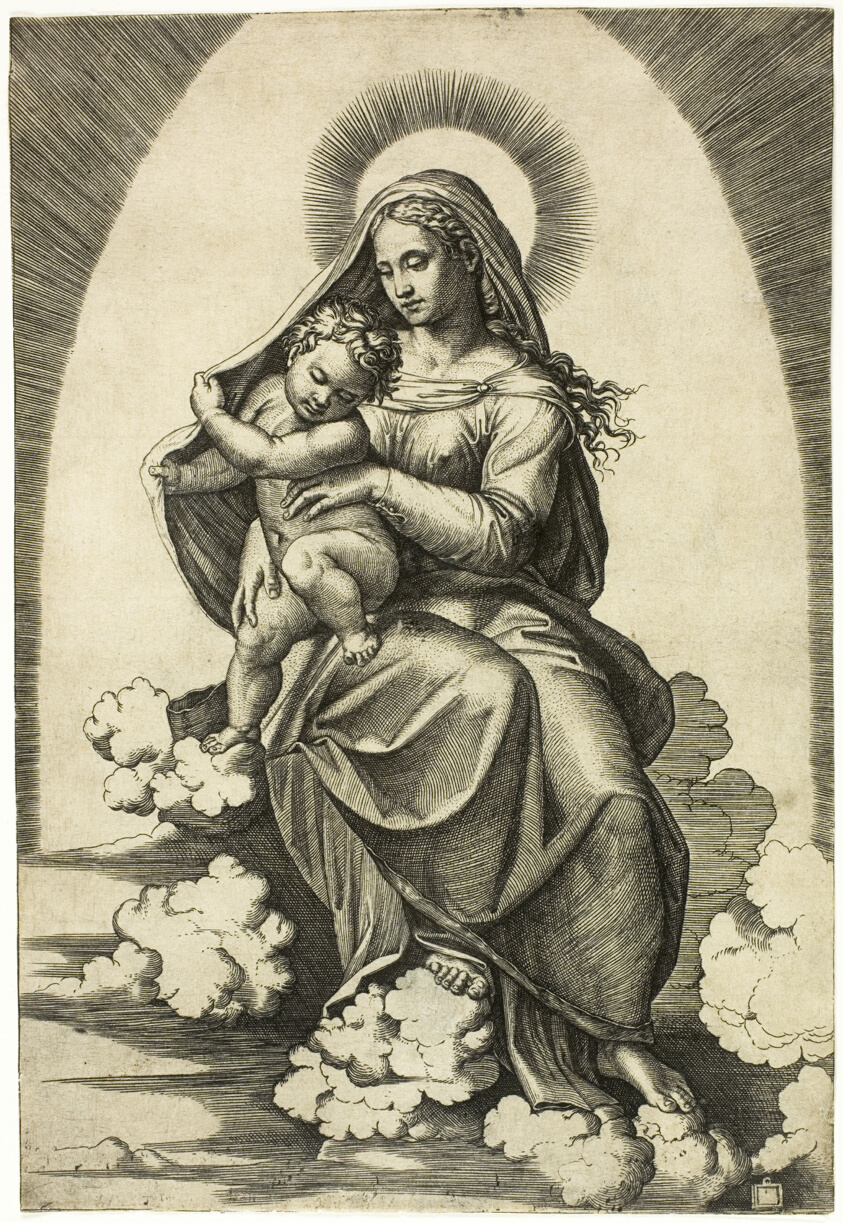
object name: Print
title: Virgin and Child Seated on Clouds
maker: Marcantonio Raimondi (Italian, c. 1480-1534); after Raffaello Sanzio, called Raphael (Italian, 1483-1520)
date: 1515/16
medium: Engraving printed in black on cream laid paper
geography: Italy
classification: engraving; print; prints and drawing